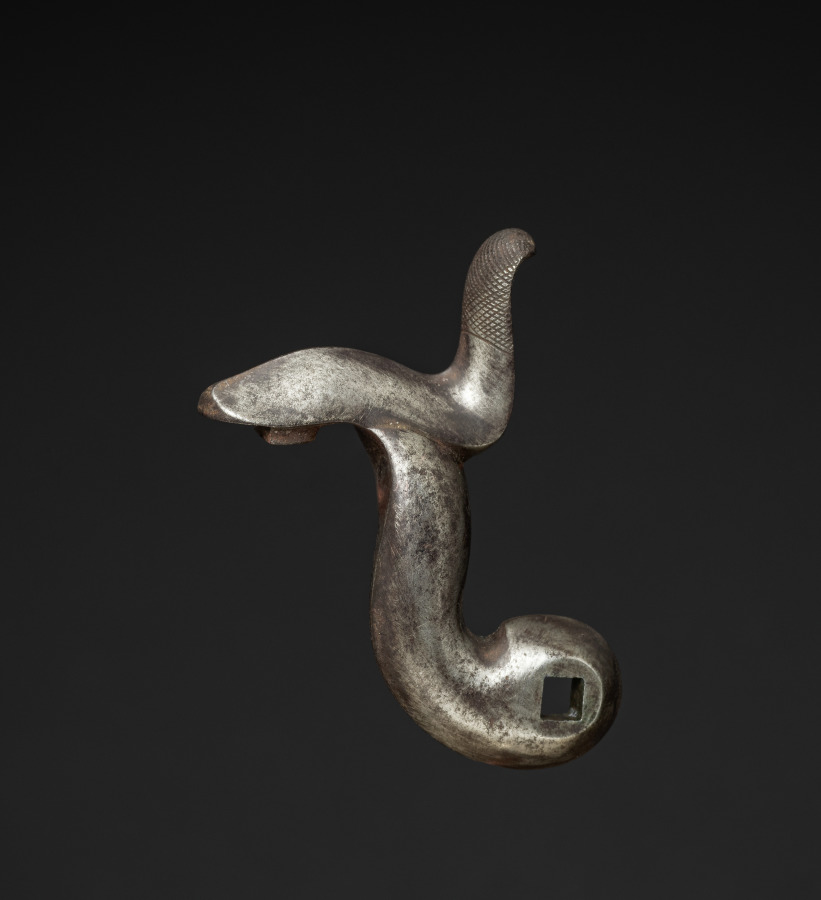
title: Gun-Lock Hammer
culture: England, early 19th century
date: c. 1800–1825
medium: steel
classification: Arms and Armor